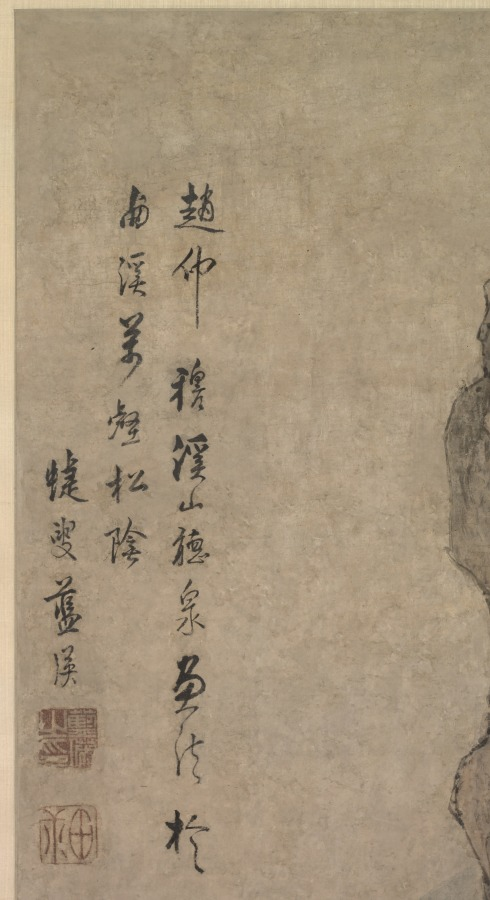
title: Landscape with Figures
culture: China, Qing dynasty (1644-1911)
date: 1644–1911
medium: hanging scroll, ink and slight color on paper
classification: Painting